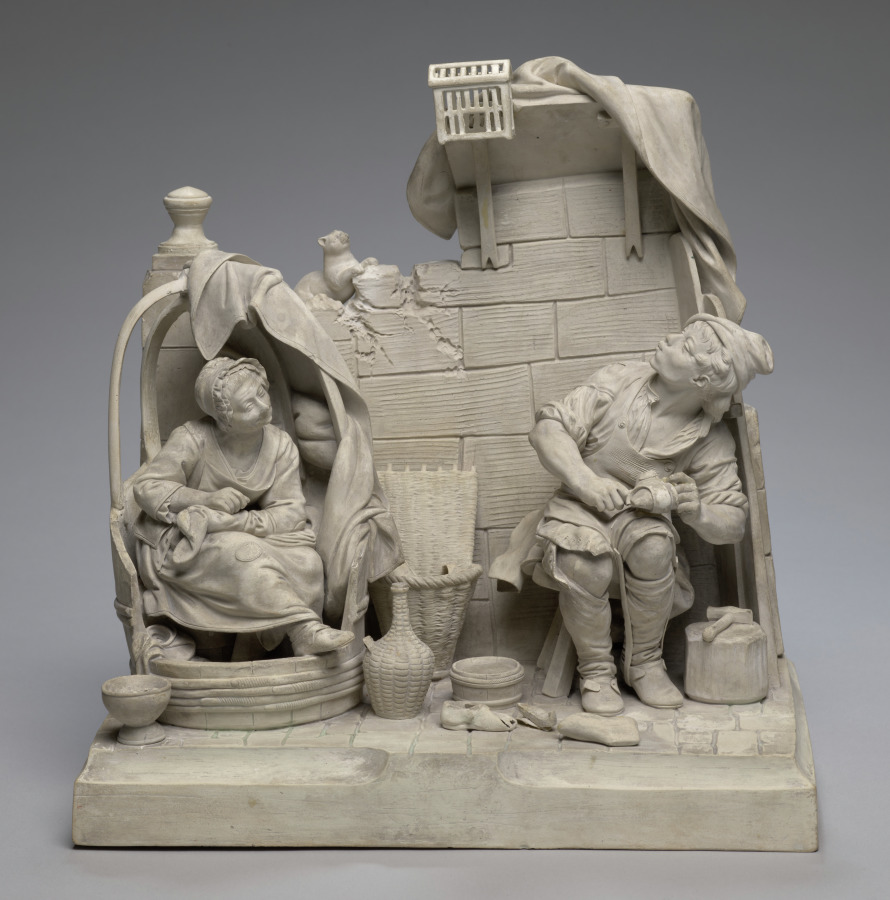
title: The Cobbler and His Bird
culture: France, Bellevue near Toul, late 18th century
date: late 1700s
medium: earthenware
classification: Ceramic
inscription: incised inscription on back of base: "Bellevue van de Toul."